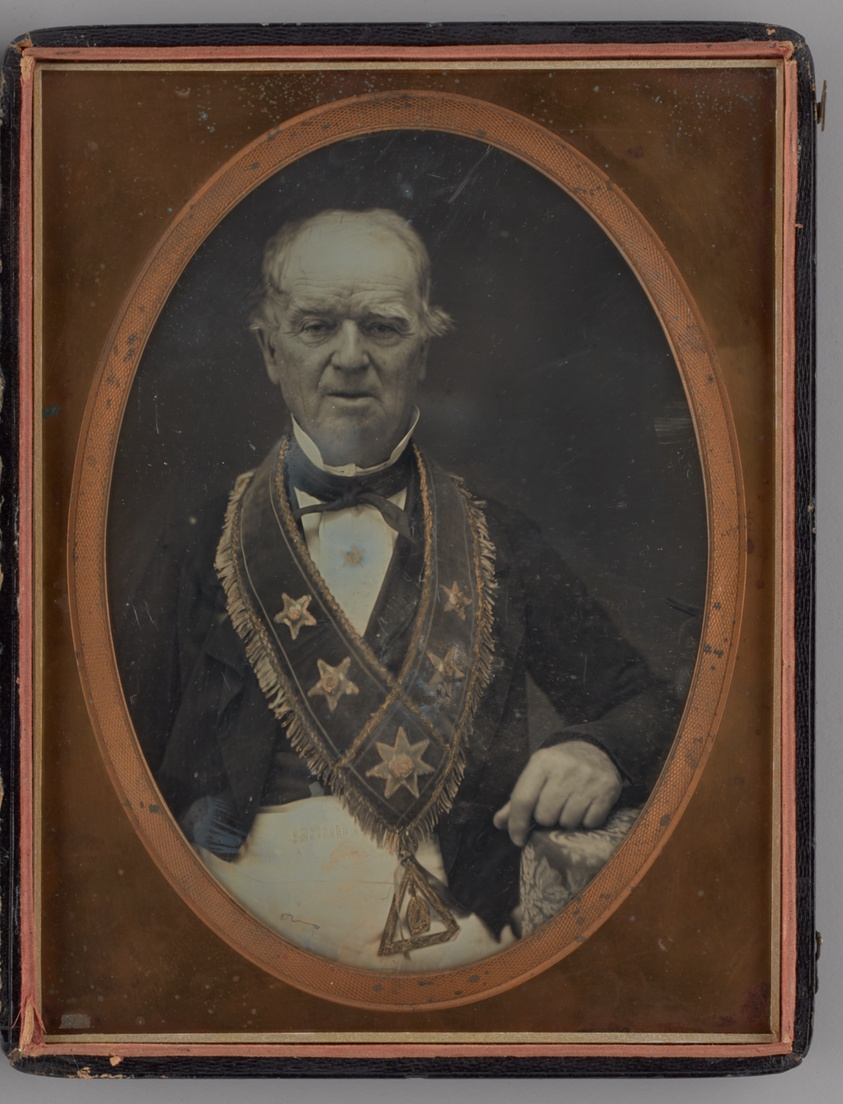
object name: Photograph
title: Untitled (Freemason)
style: 19th century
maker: Boston School (American, 19th century)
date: 1855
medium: Daguerreotype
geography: United States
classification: portrait; photography; photographic process; photograph; daguerreotype; portrait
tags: lundberg collection, portraits: male subject, portraits, portrait, photography, men, Male, Freemason